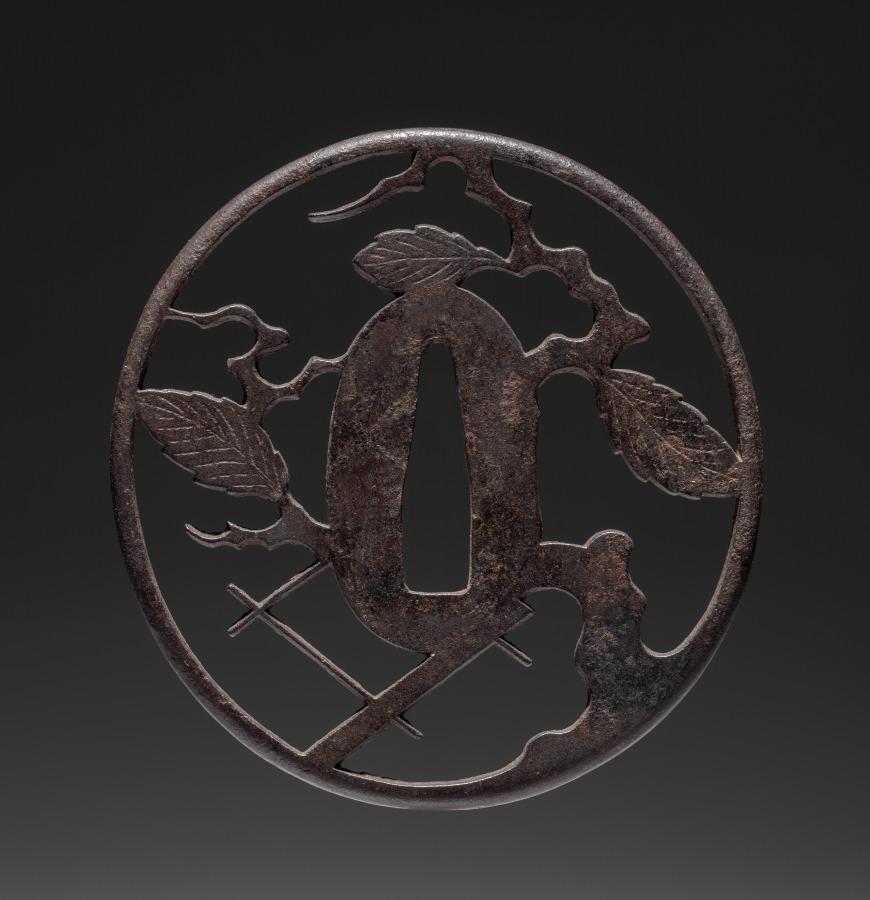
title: Sword Guard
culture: Japan, Edo period (1615–1868)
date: 1615–1868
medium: iron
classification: Arms and Armor